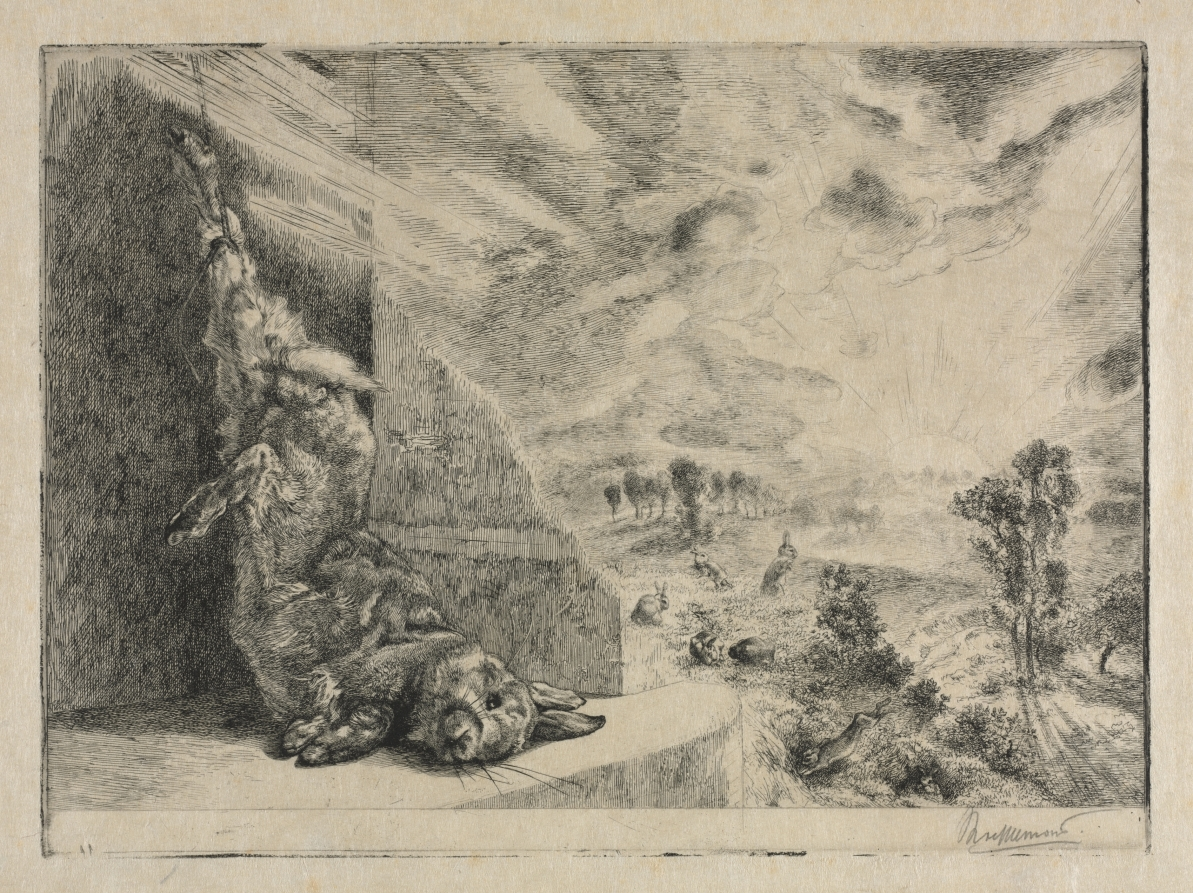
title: The Wild Rabbit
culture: France, 19th century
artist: Félix Bracquemond (French, 1833–1914)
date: 1891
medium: etching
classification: Print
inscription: signed, lower right, in pencil